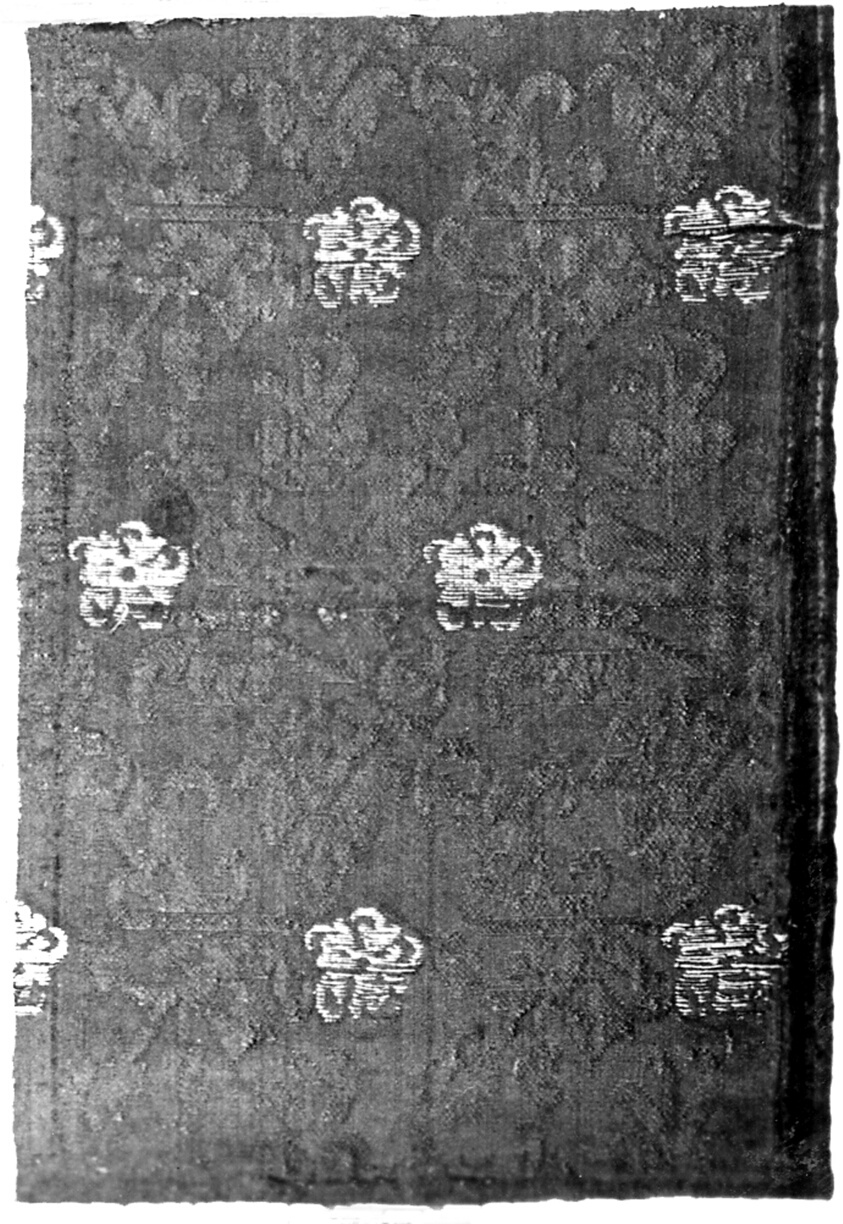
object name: Textile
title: Fragment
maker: Spain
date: Early 17th century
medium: Satin damask weaving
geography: Spain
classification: textile; weaving